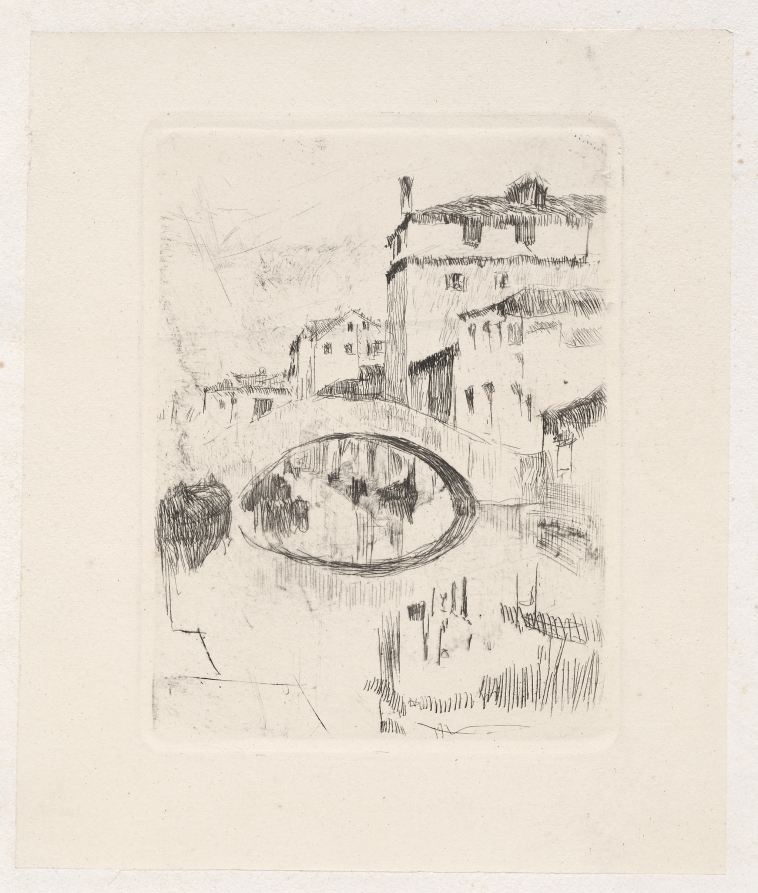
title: Bridge in Moonlight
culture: America, late 19th-early 20th century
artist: Otto H. Bacher (American, 1856–1909)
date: late 19th-early 20th century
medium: etching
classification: Print